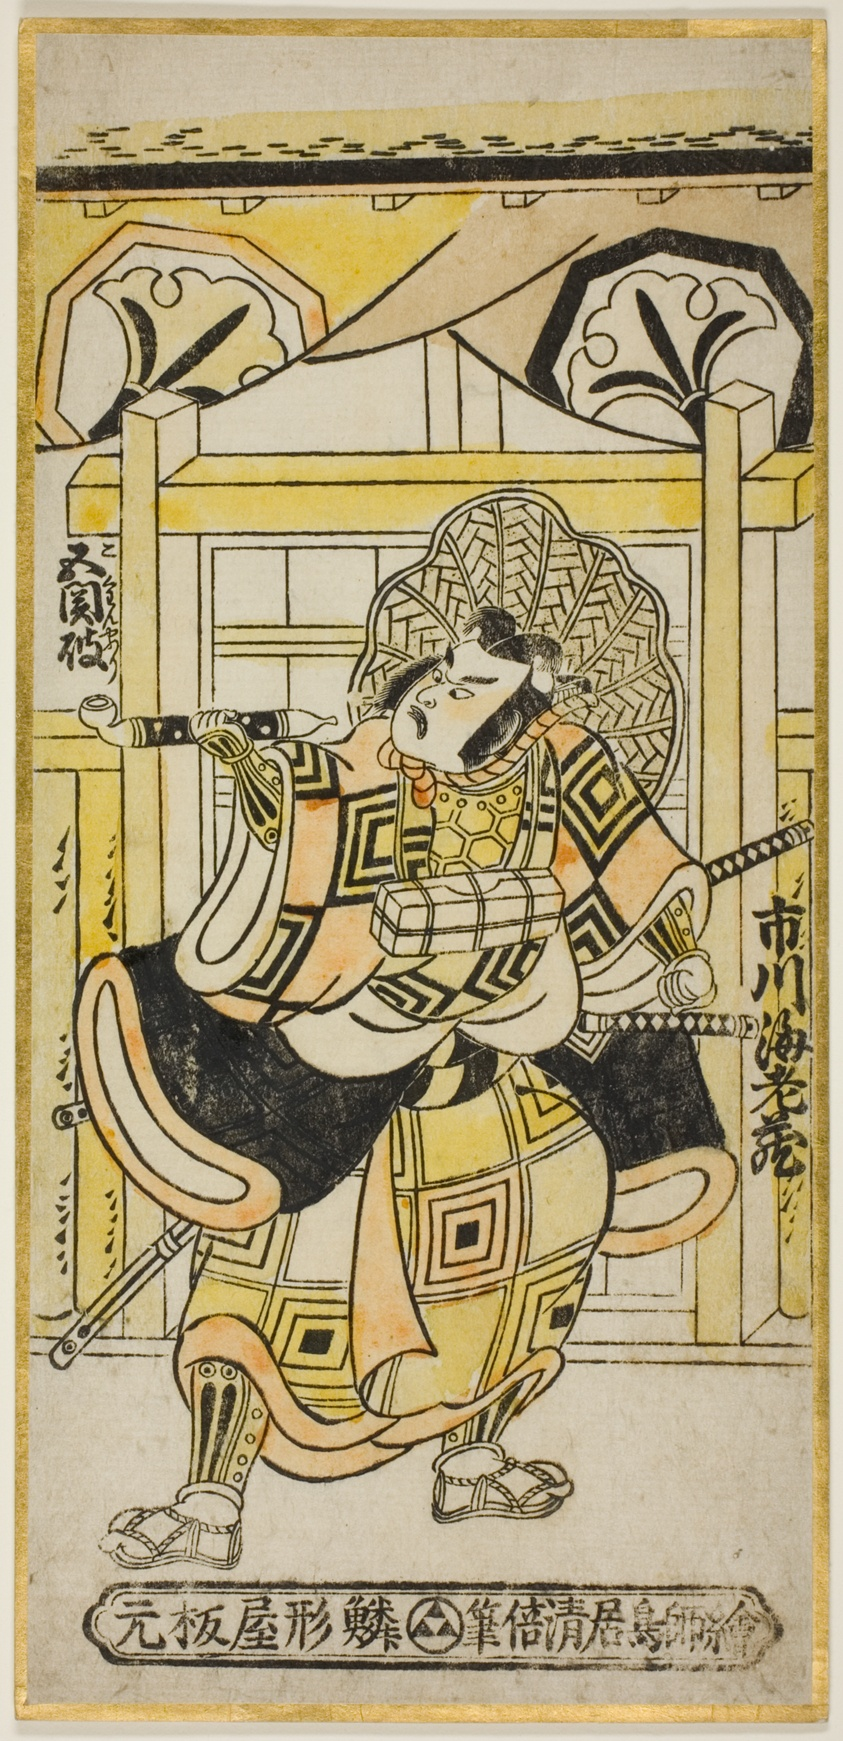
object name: Print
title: The Actor Ichikawa Ebizo II as Shinozuka Goro in the play "Funayosooi Mitsugi Taiheiki," performed at the Nakamura Theater in the eleventh month, 1743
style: Japanese (culture or style)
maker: Torii Kiyomasu II (Japanese, 1706 (?)–1763 (?))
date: 1743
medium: Hand-colored woodblock print; hosoban, urushi-e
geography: Japan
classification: woodblock print; print; asian art